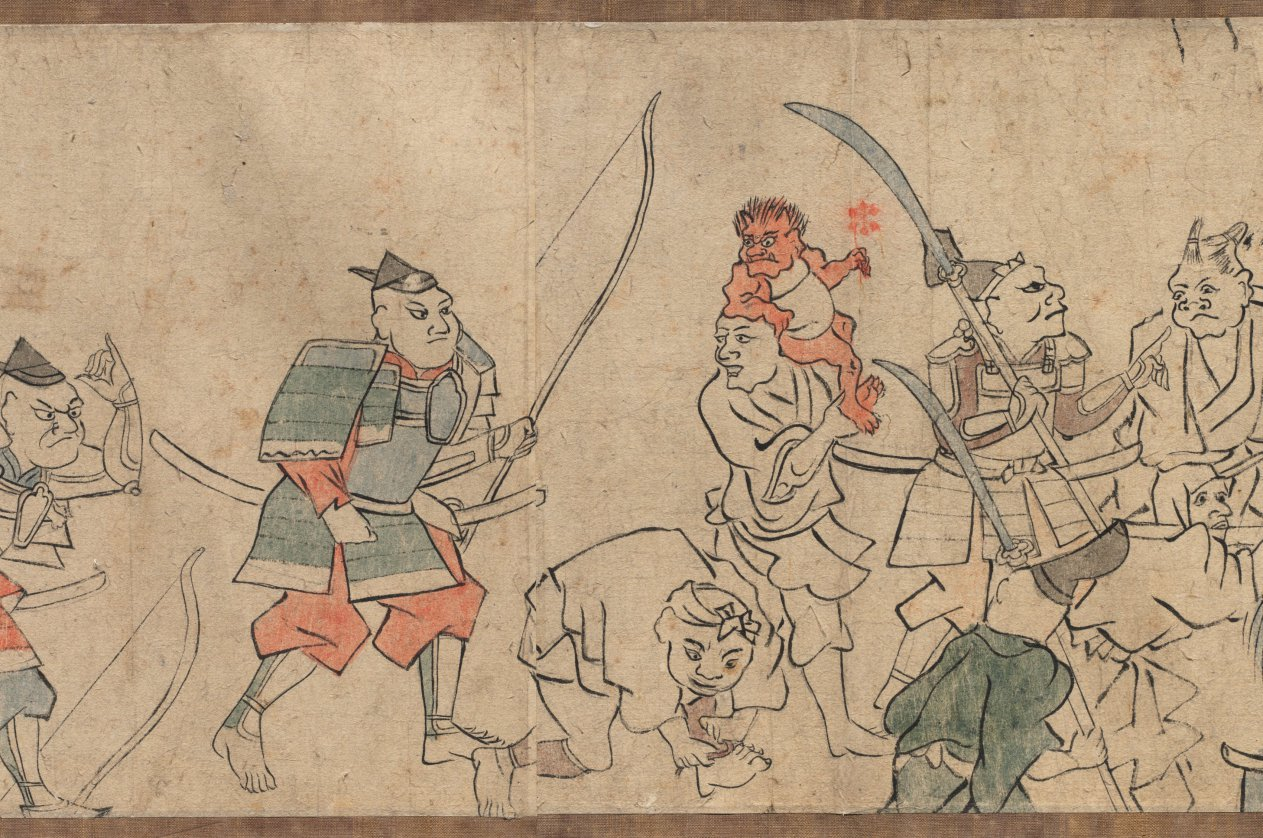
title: Oeyama Engi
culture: Japan, Edo period (1615–1868)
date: 1615–1868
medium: one of a pair of handscrolls; ink and color on paper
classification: Painting